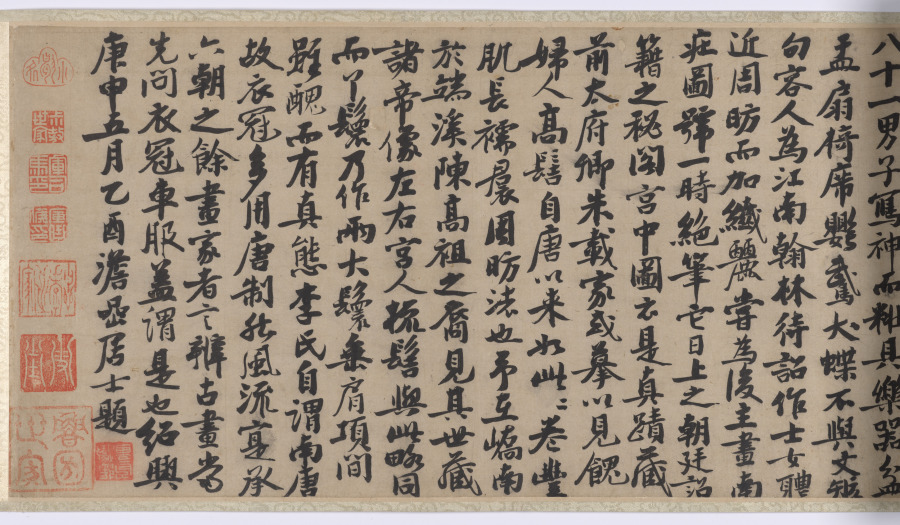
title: In the Palace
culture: China, Southern Song dynasty (1127-1279)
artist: after a work attributed to Zhou Wenju (Chinese, active 942–961)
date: before 1140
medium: Handscroll; ink and light color on silk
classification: Painting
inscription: 1 colophon and 13 seals: 1 colophon and 1 seal of Zheng Cheng 張澂 (d. 1143); 12 seals unidentified.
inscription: Colophon by Zhang Cheng 張澂 (d. 1143): 周文矩宮中圖婦人小兒其數八十，一男子寫神，而粧具、樂器、盆盂、扇椅席、鸚鵡、犬蝶不與。文矩句容人，為江南翰林待詔。作士女體近周昉，而加纖麗。嘗為後主畫南莊圖，號一時絕筆。它日上之朝廷，詔籍之祕閣。宮中圖云是真蹟，藏前太府卿朱載家。或摹以見餽。婦人高髻自唐以來如此。此卷豐肌長襦裙，周昉法也。予至嶠南，於端溪陳高祖之裔，見其世藏諸帝像，左右宮人梳髻與此畧同。而丫鬟乃作兩大鬟，垂 肩項間，雖醜而有真態。李氏自謂南唐，故衣冠多用唐制，然風流寔承六朝之餘。畫家者言辨古畫當先問衣冠車服，蓋謂是也。紹興庚申五月乙酉澹嵒居士題。 印：張澂印章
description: In the Palace depicts 13 ladies of the imperial household, three servants, and six children in fluent baimiao (plain drawing) brushwork, accentuated by color. The women entertain themselves by making music, tending children, and playing with pets. Their elaborate hairstyles, plump figures, and flowing robes are reminiscent of Tang dynasty fashion. The scroll illustrates elegant court life and is a direct copy of the original by Zhou Wenju (active 940–75) from Zhenjiang, Jiangsu province. Zhou was employed at the Southern Tang court in Nanjing under Emperor Li Yu (reigned 961–76), a prolific poet.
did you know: The ladies' elaborate hairstyles, plump figures, and flowing robes are reminiscent of Tang dynasty fashion.